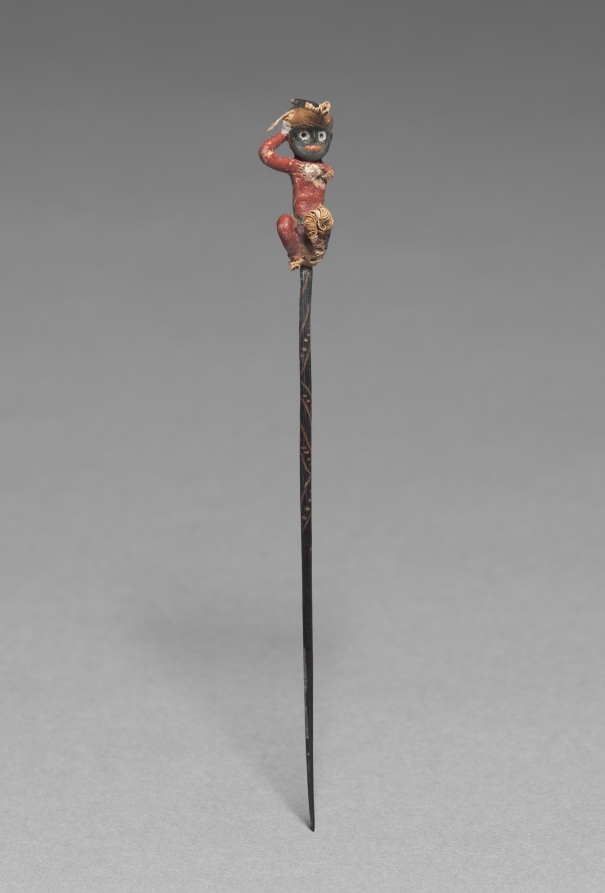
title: Pin with Yarn Figure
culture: Peru, South Coast, Nasca style?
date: c. 300 BCE–200 CE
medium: wood, yarn, paint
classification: Jewelry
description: Paracas headgear from mummy bundles sometimes incorporate human-hair wigs, wound with long headbands and slings. Ornamented with a diminutive kneeling figure, this pin may have been used like a hat pin to hold the wrappings in place. Although poorly preserved, this object illustrates the use of resin pigment on materials other than ceramics.